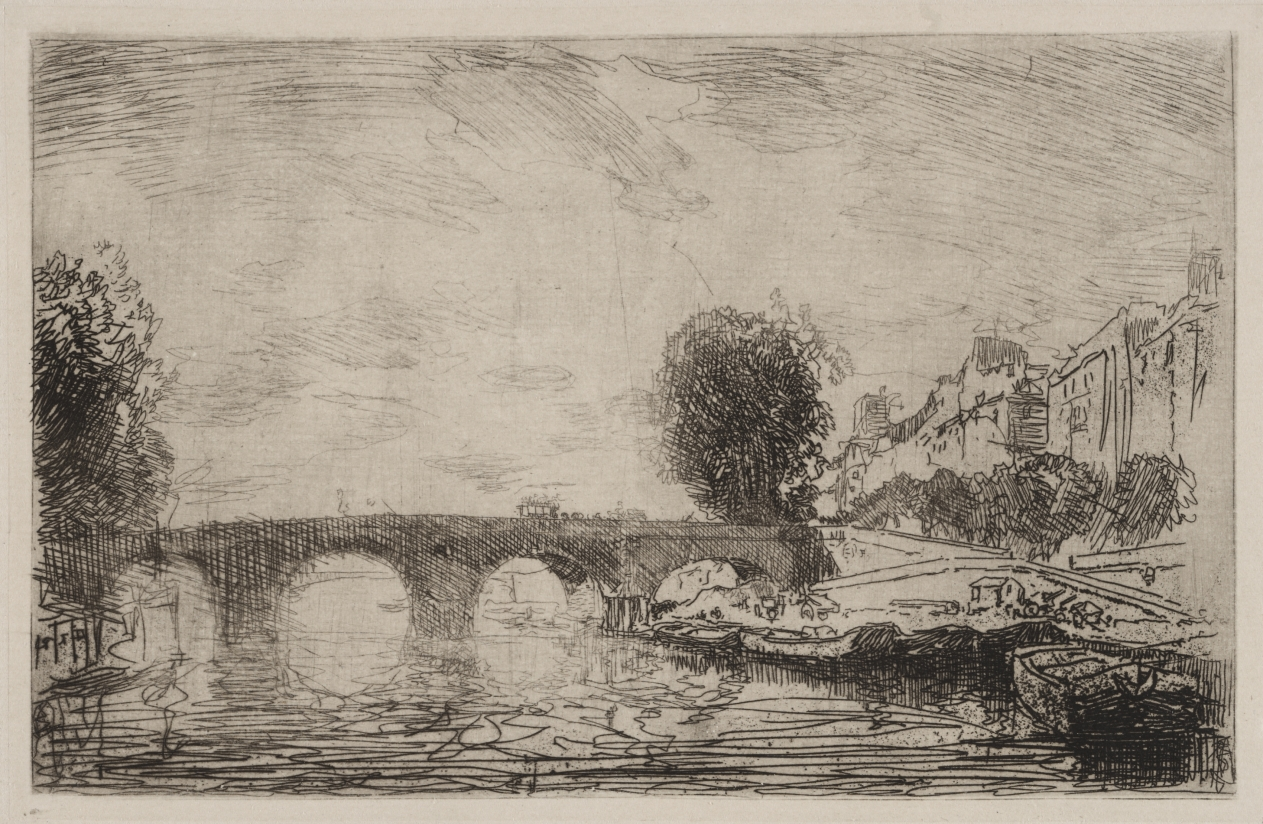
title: Sunset at Pont Marie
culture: France, 19th century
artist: Auguste Louis Lepère (French, 1849–1918)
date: 1890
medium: etching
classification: Print